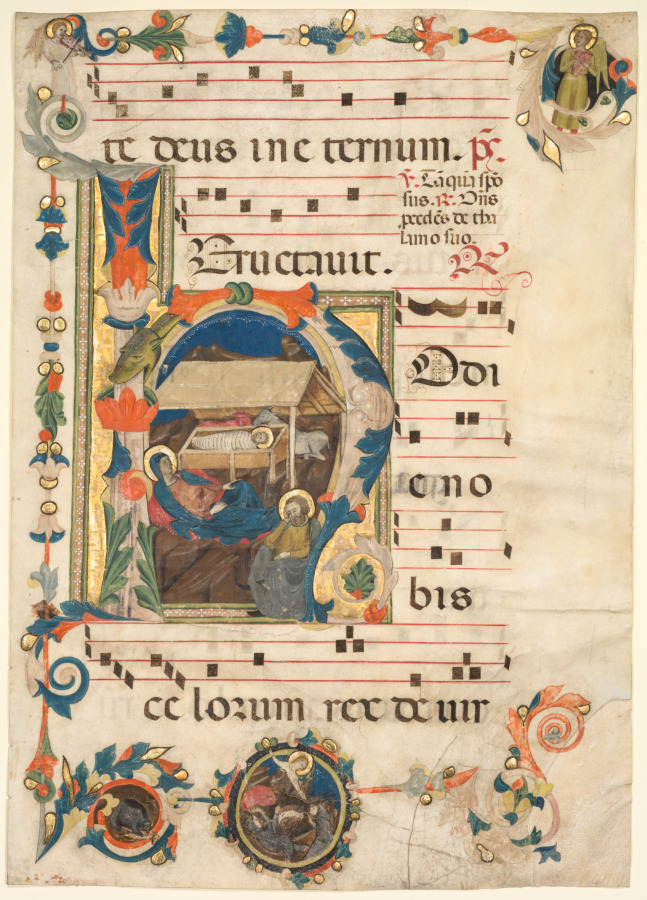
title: Leaf from an Antiphonary with Historiated Initial (H) with The Nativity (recto) and Music (verso)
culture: Italy, Tuscany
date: early 1300s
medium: ink, tempera, and gold on parchment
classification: Manuscript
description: This enormous initial h illustrates the beginning of the text of the first matins response for Christmas Day: Hodie nobis celorum rex (“On this day the King of Heaven”). The initial is appropriately decorated with a scene of Christ’s nativity. Along with other painters and illuminators, Neri da Rimini established the school of Rimini, characterized by a painting style owing much to the work of Giotto, who he perhaps encountered in Padua.